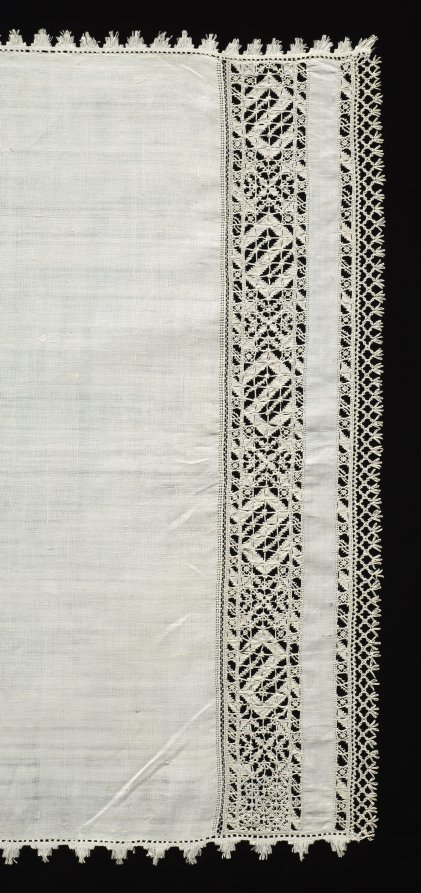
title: Lace Cloth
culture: Italy, Venice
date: 1500s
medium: Linen: needle lace, reticella and bobbin lace border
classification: Lace